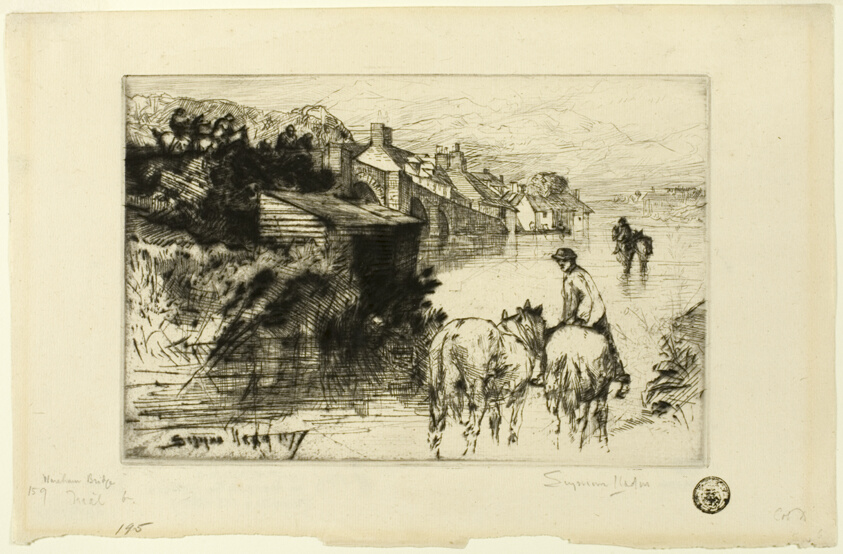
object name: Print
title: Wareham Bridge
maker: Francis Seymour Haden (English, 1818-1910)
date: October 1877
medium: Drypoint on copper printed on cream laid paper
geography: England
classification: etching; print; prints and drawing